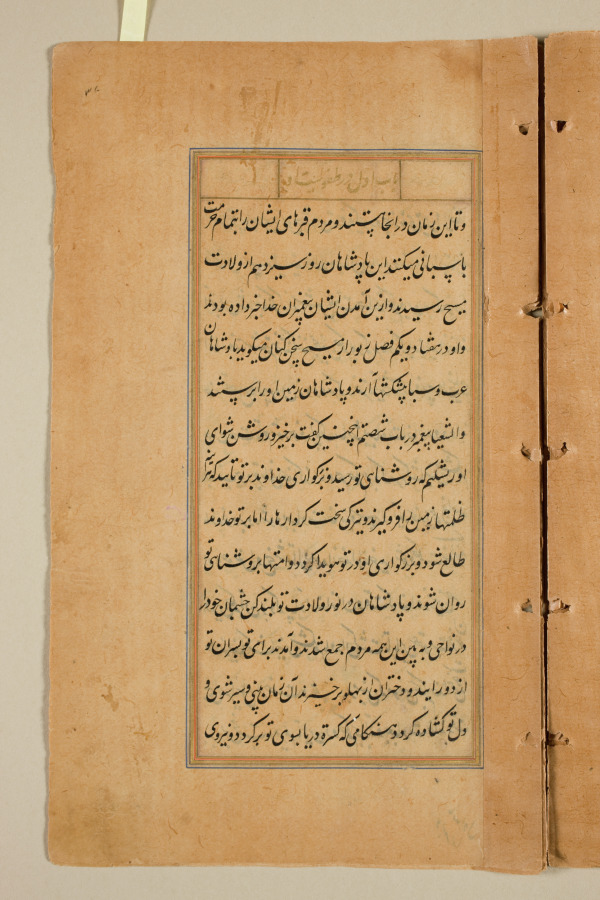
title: Text page from a Mirror of Holiness (Mir’at al-quds) of Father Jerome Xavier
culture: Mughal India, Allahabad, made for Prince Salim (1569–1627)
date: 1602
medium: Ink and gold on paper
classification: Manuscript